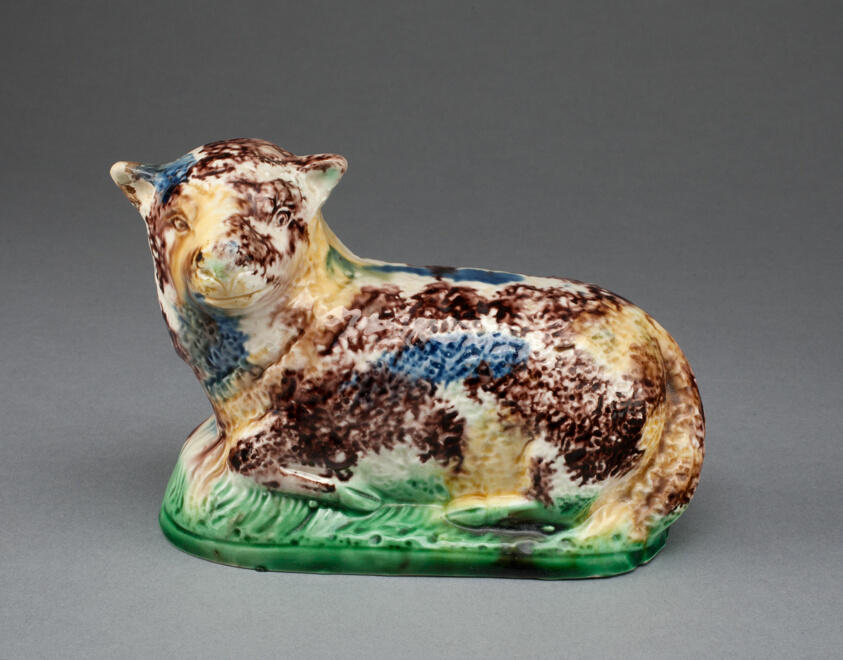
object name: Ceramics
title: Ram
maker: Staffordshire, England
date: c. 1780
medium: Lead-glazed earthenware (creamware)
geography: Staffordshire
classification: earthenware; creamware; ceramics; european decorative arts; lead-glazed earthenware